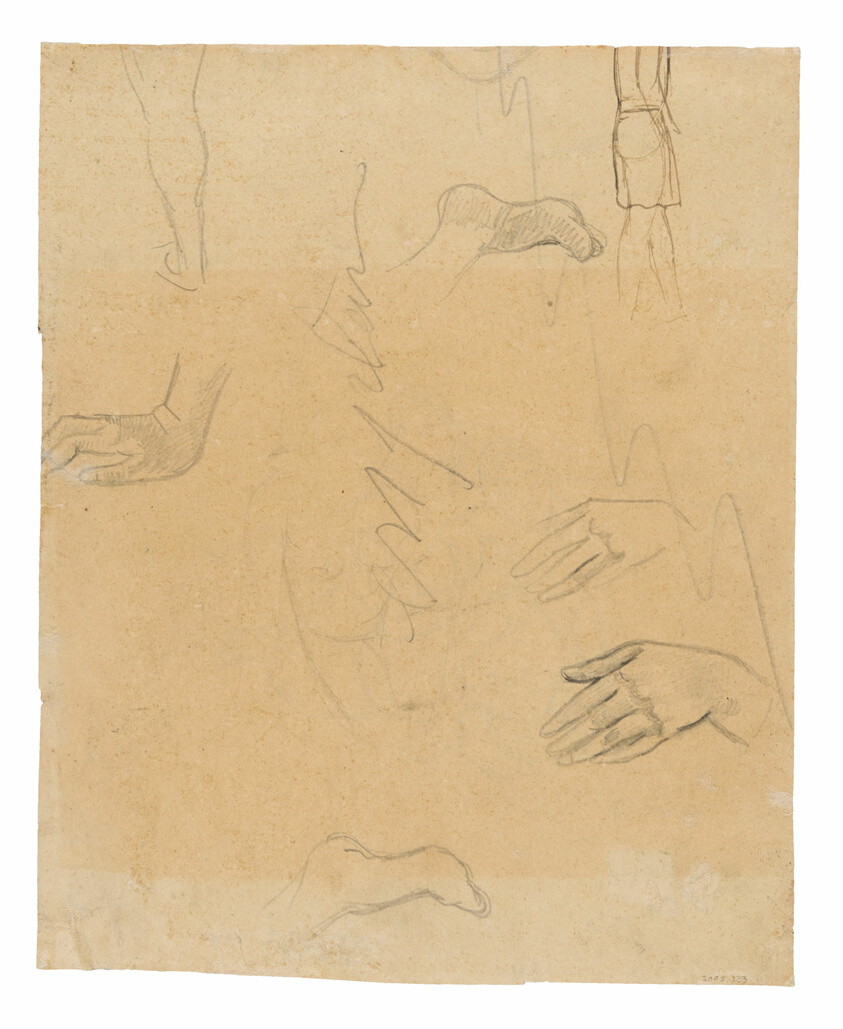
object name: Drawing and Watercolor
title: Sketches of Figures, Hands, and Feet (related to the painting Aha oe feii? [What! Are You Jealous?])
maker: Paul Gauguin (French, 1848-1903)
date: 1891/93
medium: Black fabricated chalk with pen and brown ink (originally purple) on cream wove paper (removed from a sketchbook)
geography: France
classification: pen and ink drawings; graphite; drawings (visual works); prints and drawing